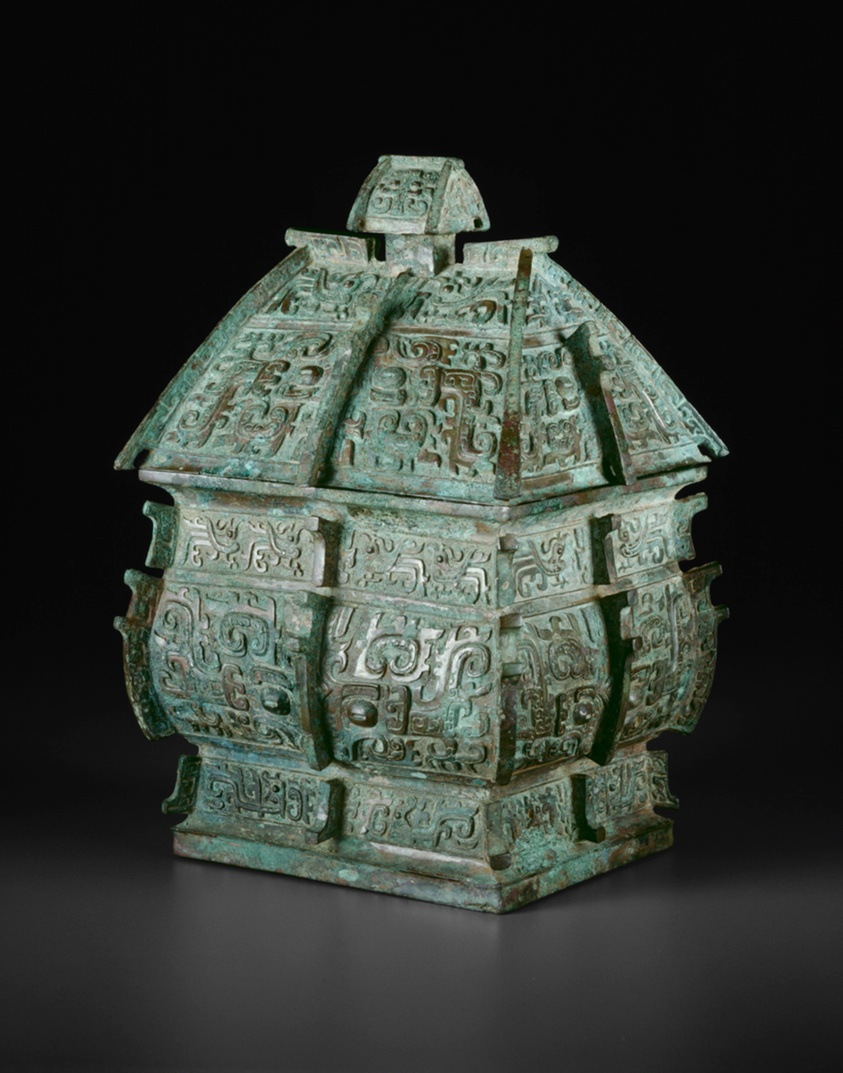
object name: Vessel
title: Wine Container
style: Chinese (culture or style)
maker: China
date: Western Zhou dynasty ( 1046–771 BC ), late 11th century BC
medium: Bronze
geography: China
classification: bronze; metal; vessel; asian art